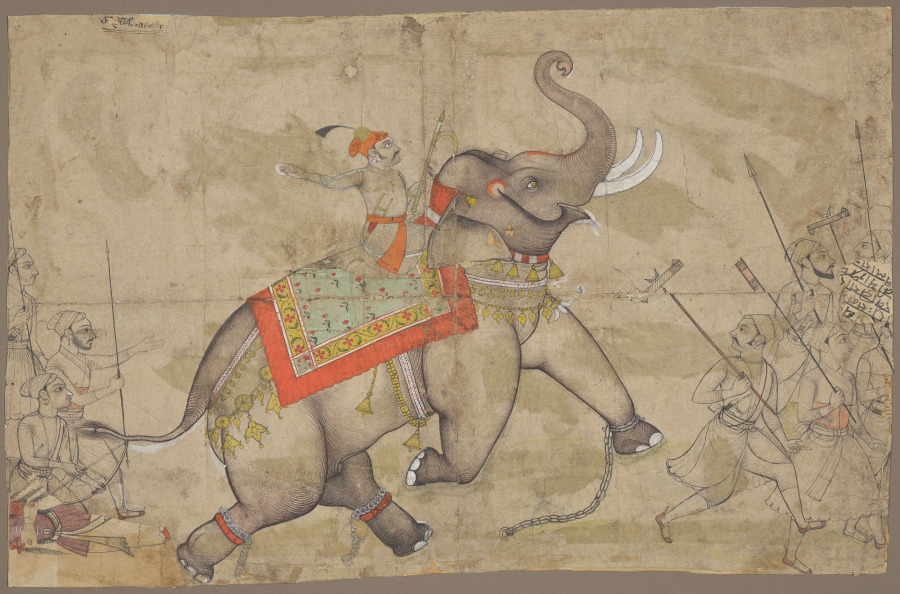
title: A Raja on an Elephant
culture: India, Rajasthan, Ajmer area, possibly Sawar school, late 17th Century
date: c. 1680–1700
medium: ink with touches of color on paper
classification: Drawing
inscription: Torn inscription at top left: "Maharaja L [?]...."